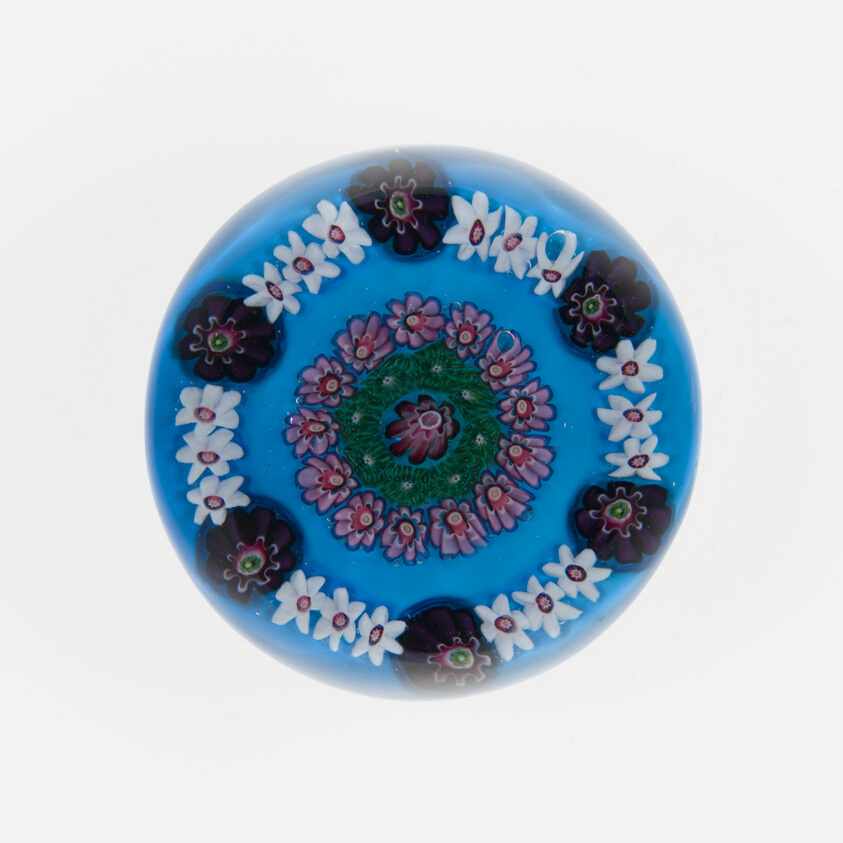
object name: Glass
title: Paperweight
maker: Clichy Glassworks (Cristalleries de Clichy); Clichy, France, 1837-1885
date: c. 1845/60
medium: Glass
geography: France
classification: paperweight; glass